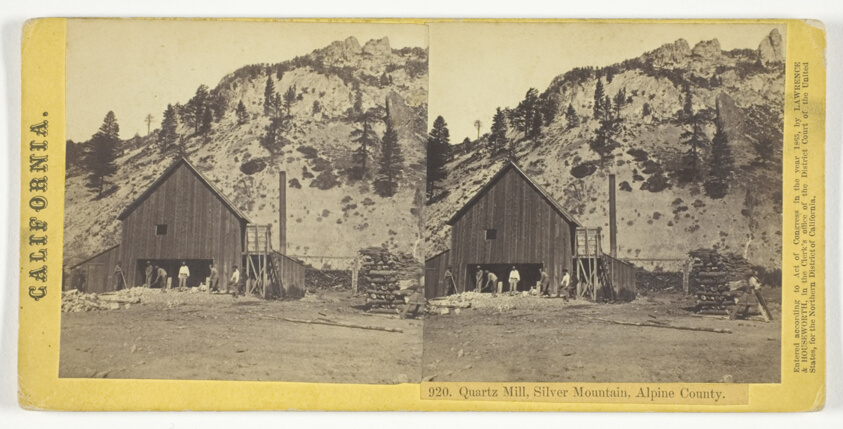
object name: Photograph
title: Quartz Mill, Silver Mountain, Alpine County, California, No. 920 from the series "California"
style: 19th century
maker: Lawrence & Houseworth; American, active 1860s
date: 1865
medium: Albumen print, stereo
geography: United States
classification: stereograph (albumen); albumen silver print; photographic process; photography; photograph